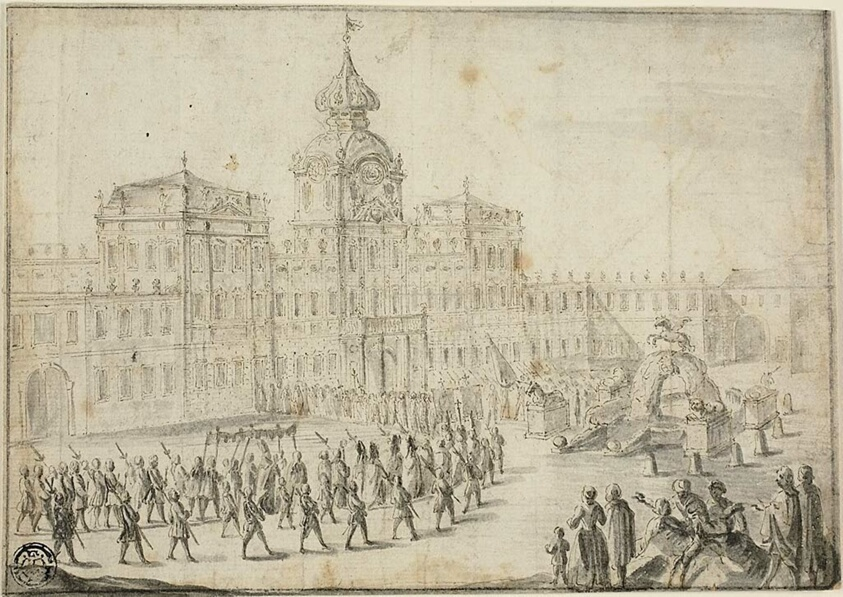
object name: Drawing and Watercolor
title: Religious Procession Entering Schloss Mirabell, Salzburg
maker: Israël Silvestre; French, 1621-1691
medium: Pen and brown ink with brush and gray wash on ivory laid paper, laid down on tan laid paper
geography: France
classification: pen and ink drawings; drawings (visual works); prints and drawing